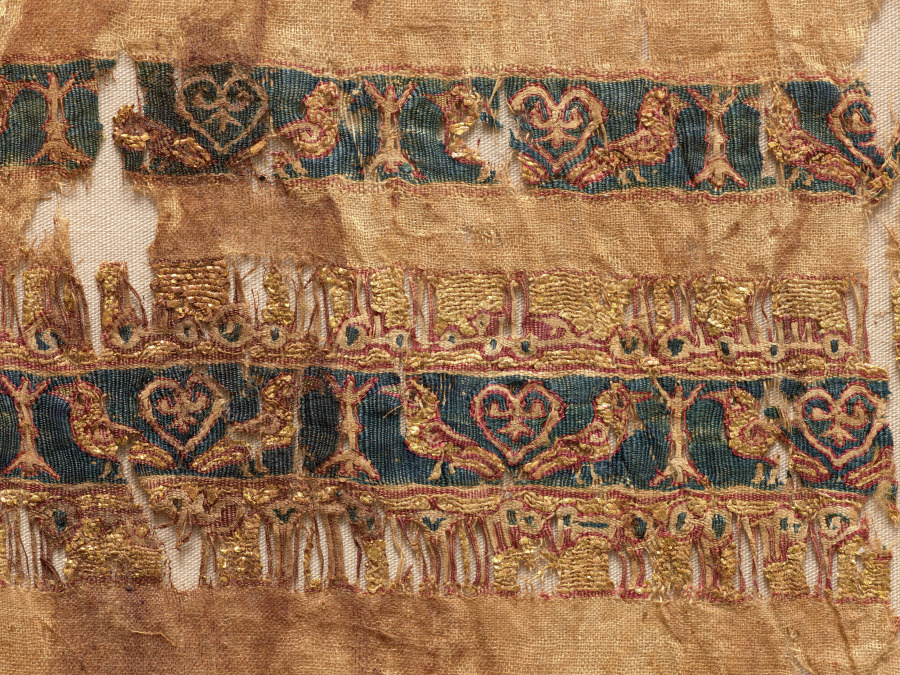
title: Tiraz with gold, probably from a wide sleeve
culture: Egypt, Fatimid period, reign of Caliph al-Hakim, 1013–20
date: 1013–1020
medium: plain weave with inwoven tapestry weave: linen, silk, and gold filé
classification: Textile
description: This textile with expensive gold foil is among the rarest surviving examples among thousands of medieval textiles with historic or generic inscriptions in Arabic, known as tiraz. Tiraz were "emblems of dignity," the prerogative of sovereigns and those they wished to honor. This inscription is masterful. The tall letters are woven with silk thread on only two warps in slit-tapestry weave while the ground was woven with pure gold foil wrapped around a silk core that was not beaten in—to show off its brilliance. The text begins with a prayer and provides the name of Imam al-Hakim, but lacks the place and date of manufacture. The decorative bands feature brilliant gold birds facing simplified trees alternating with popular palmette-decorated hearts. This tiraz fragment may have been part of a wide sleeve that functioned as a receptacle because clothing didn’t have pockets.